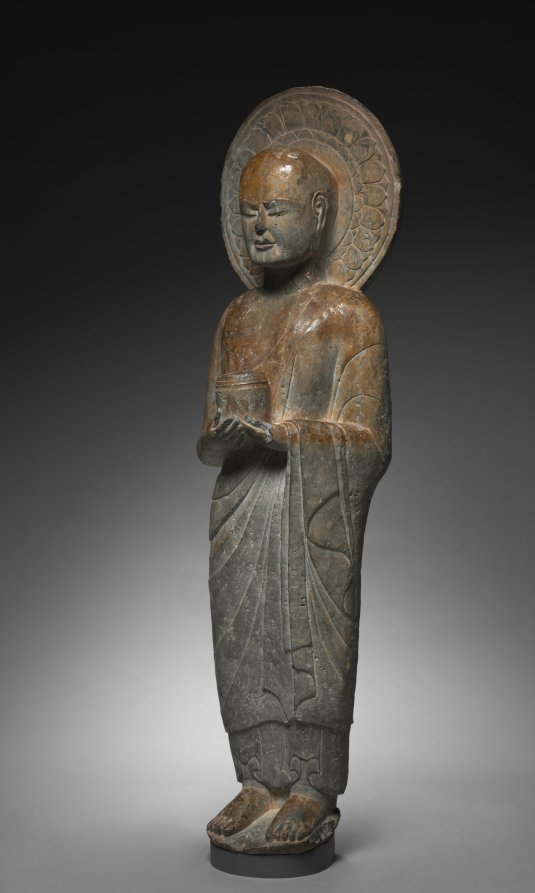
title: Standing Disciple Mahakasyapa Holding a Cylindrical Reliquary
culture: China, Hebei province, Southern Xiangtangshan caves, Northern Qi dynasty (550-577)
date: c. 550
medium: limestone with traces of pigment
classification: Sculpture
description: Mahakasyapa, the disciple of Shakyamuni, is presented with closed eyes in an expression of meditative concentration. He is holding a reliquary for the Buddha’s ashes, which symbolize the Buddha entering final spiritual attainment (nirvana) at death. The artistic simplicity exemplifies the spiritual content of this figure.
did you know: The complex of Buddhist cave temples at Xiangtangshan, “Mountain of Echoing Halls,” is a central achievement of the Northern Qi period.